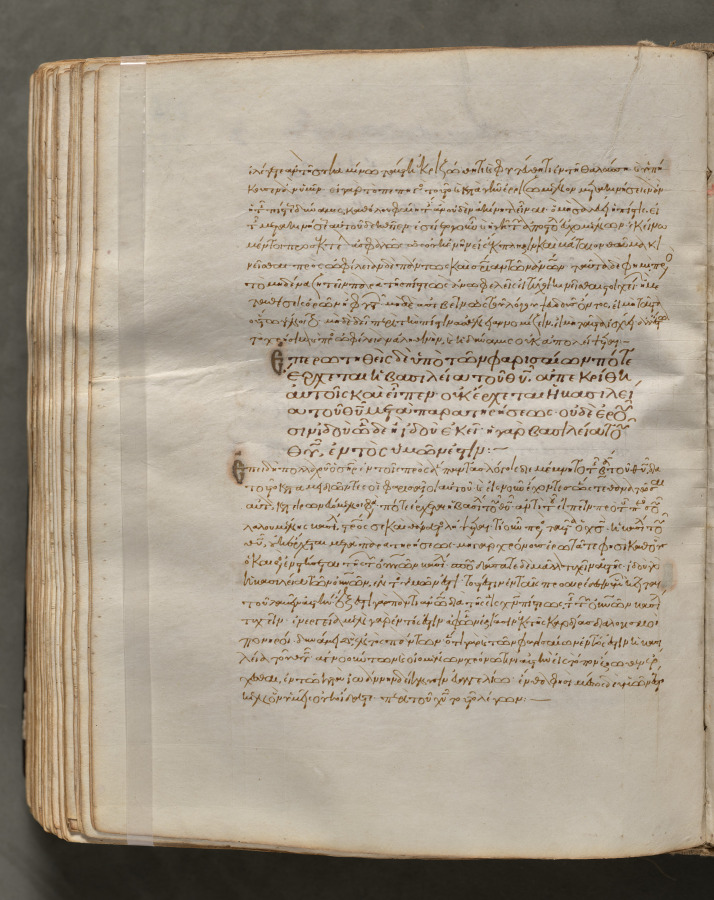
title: Text, folio 287 (verso), from a Gospel Book with Commentaries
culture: Byzantium, Constantinople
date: c. 1000–1100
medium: ink, tempera, and gold on vellum; leather binding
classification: Bound Volume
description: Each of the four gospels in this book opens on a page with brilliantly illuminated borders depicting the author of the text as well as birds—principally peacocks, symbols of the immortality of the soul—and fountains, representing the fountain of life and the salvation of the soul. This volume consists of 428 leaves with texts in Greek. Its level of sophistication suggests that it was probably written and decorated in a monastery in Constantinople.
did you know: Gospel books were carried in procession through Byzantine churches.